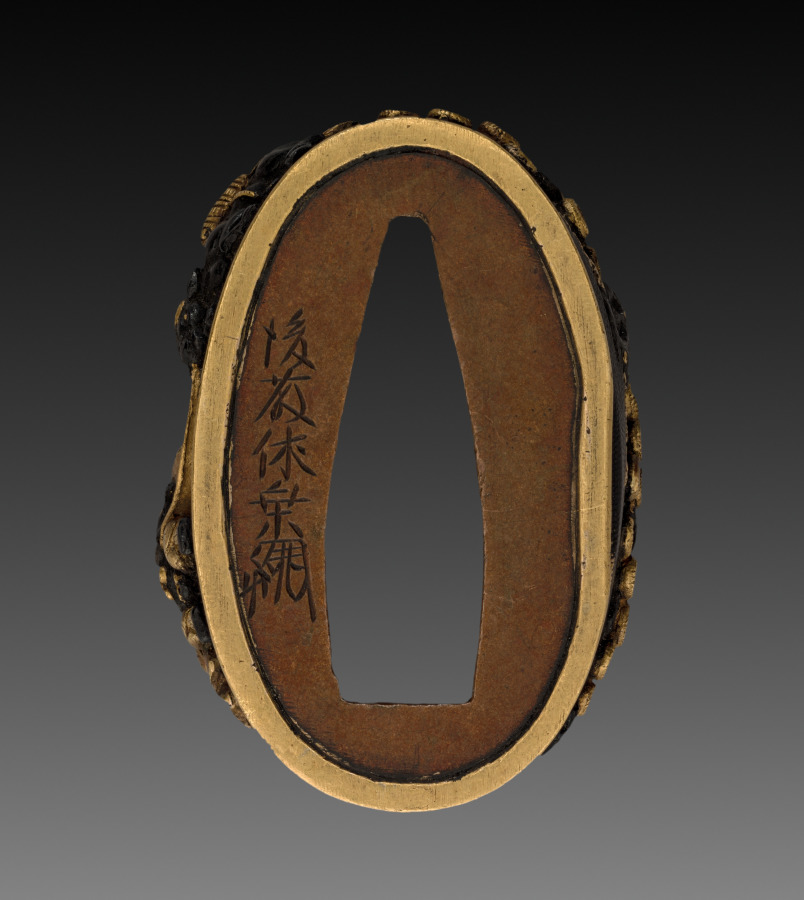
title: Sword-Hilt Collar (Fuchi)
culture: Japan, Edo period (1615–1868)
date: 1700–1850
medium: shakudo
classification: Arms and Armor